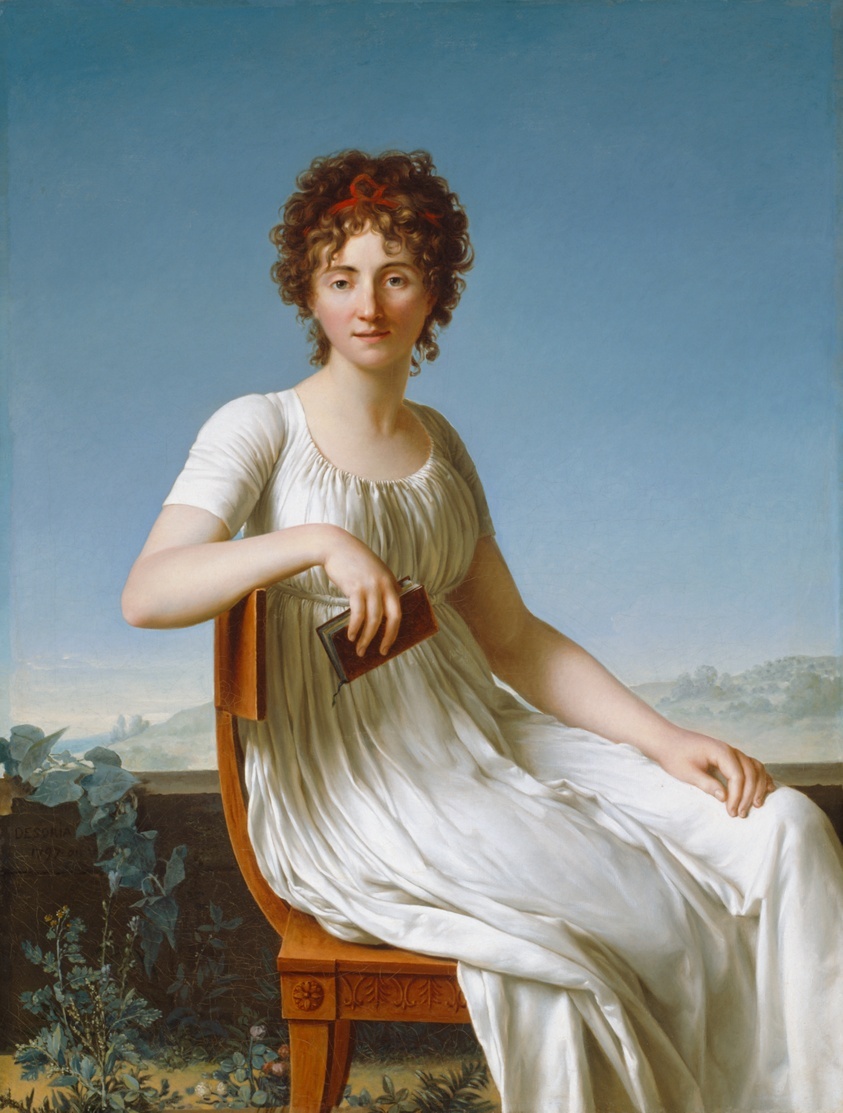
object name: Painting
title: Portrait of Constance Pipelet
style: Neoclassicism, 18th Century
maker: Jean-Baptiste-François Desoria (French, 1758–1832)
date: 1797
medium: Oil on canvas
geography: France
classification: oil on canvas; oil paintings (visual works); paint; france; french; portrait; painting; european painting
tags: portraits: female subject, book, chair, fashion, France, French, landscape, portrait, portraits, portraits: French subject, wealth, white (color), woman